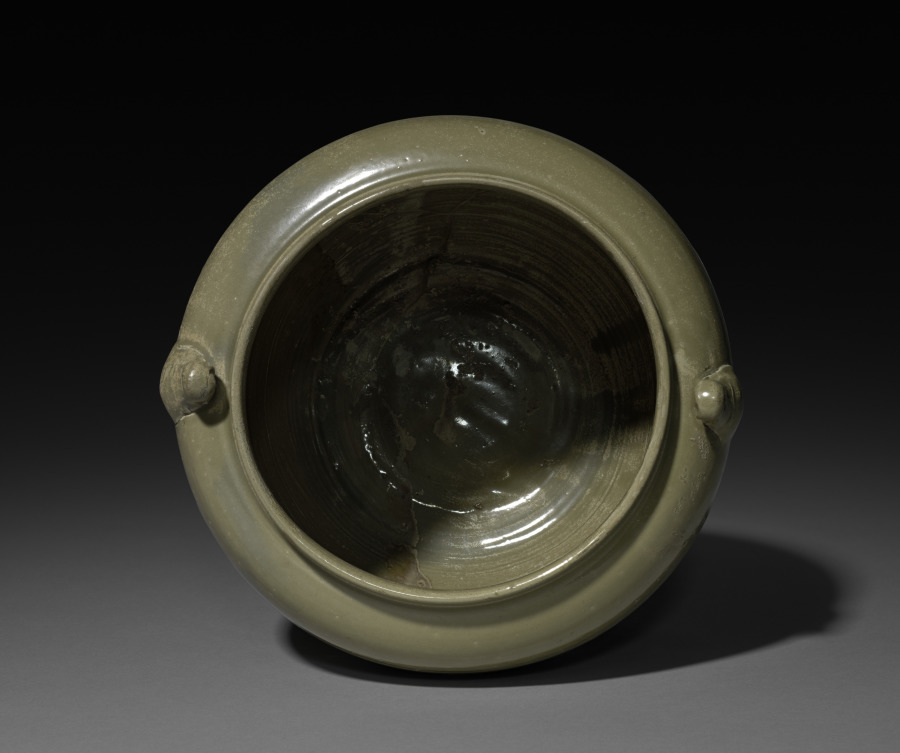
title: Jar with Handles: Yue ware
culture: China, Tang dynasty (618-907)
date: c. 800s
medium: gray stoneware with iron glaze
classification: Ceramic